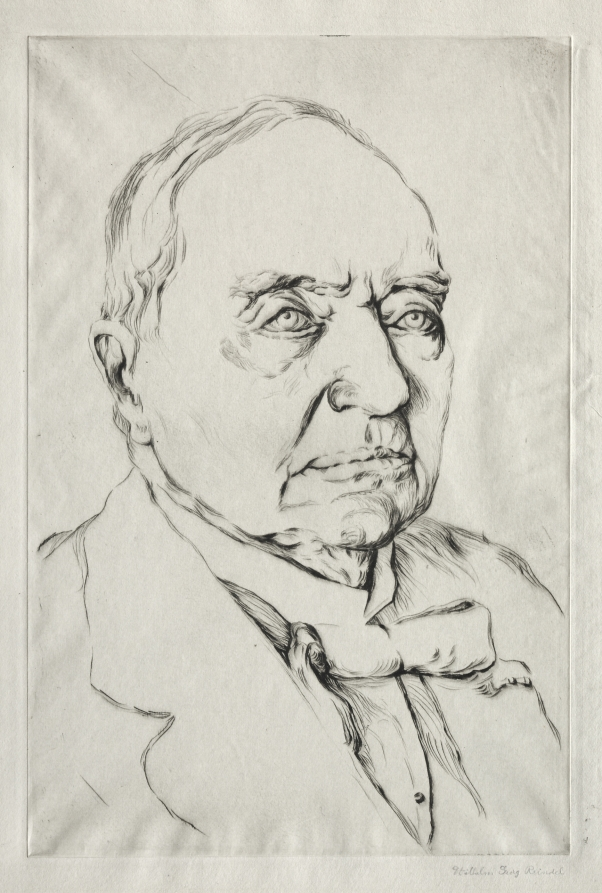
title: Joseph G. Butler, Jr.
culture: America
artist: William George Reindel (American, 1871–1948)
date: c. 1918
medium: drypoint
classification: Print